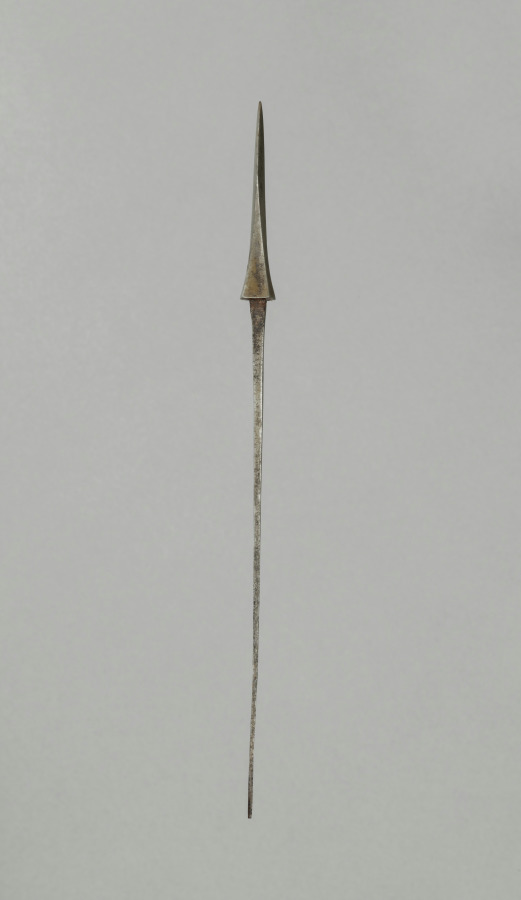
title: Arrow Point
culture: Japan, Edo period (1615–1868)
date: 1700s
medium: steel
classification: Arms and Armor